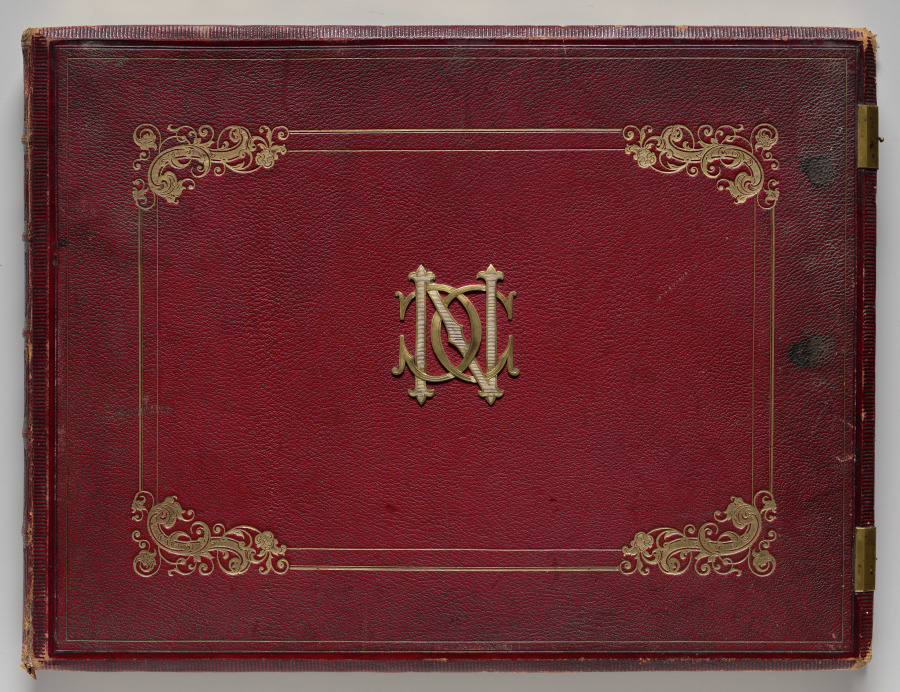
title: Photographs of Northern India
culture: England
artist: Samuel Bourne (British, 1834–1912)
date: 1863–70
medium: Album of 50 albumen prints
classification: Bound Volume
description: The 50 images in this album, all taken in the 1860s, move from the hill towns of the Himalayas down to cities including Lahore (now in Pakistan), Delhi, Lucknow, Agra, Benares (now Varansi), and Calcutta (now Kolkata). Architectural studies of major monuments offer valuable historical records of what sites such as the Taj Mahal and the imperial mosque of the Mughal emperors in Delhi looked like before twentieth-century restorations.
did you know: Samuel Bourne, the author of most the images in this album, was a banker in England before he moved to India to become a professional photographer.